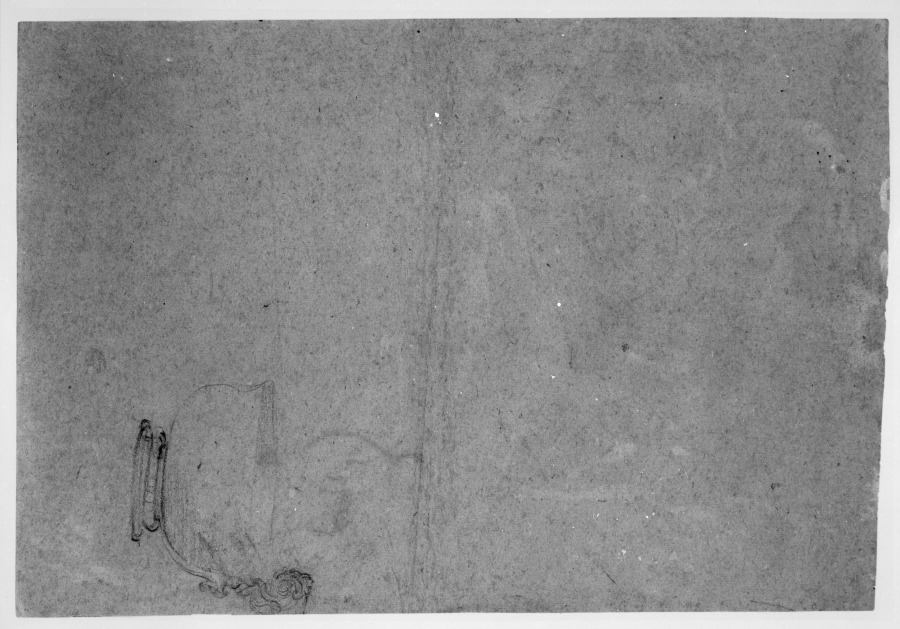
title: Footed Vessel with Handle (verso)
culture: Italy, 16th century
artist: Annibale Carracci (Italian, c. 1560–1609)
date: 1595–97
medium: black chalk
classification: Drawing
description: To atone for the crime of killing his family, the Greek hero Hercules was required to perform twelve labors. In this final study for a fresco of this subject commissioned by Cardinal Odoardo Farnese for the ceiling of his study in his family’s Roman palace, Hercules rests, surrounded by evidence of his toil: the head of the Erymanthian boar he captured; the three golden apples of the Hesperides; and the hide of the Nemean lion on which he sits. The hero’s pose and exaggerated musculature are a result of the artist’s intense study of ancient models, and emulate specific antique sculptures depicting river gods in the Farnese collection. Carracci also worked with full knowledge of Michelangelo’s frescoes on the Sistine Chapel ceiling (1508-10), and the pose of Hercules may have been inspired by the reclining figure of Adam in Michelangelo's Creation of Adam scene.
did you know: The squares drawn lightly over this composition suggest that it was used to transfer the design to another surface such as a full-scale cartoon.